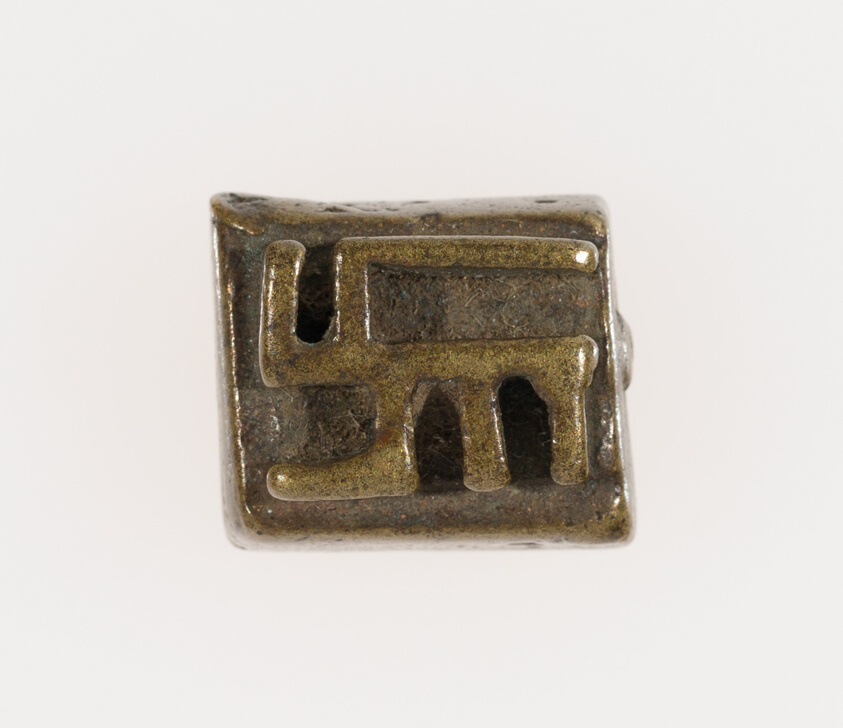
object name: Decorative Arts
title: Goldweight with a Geometric Design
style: asante, Arts of Africa, akan, african Art, Coastal West Africa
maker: Asante or related Akan-speaking peoples; Ghana; Coastal West Africa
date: 18th/19th century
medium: Copper alloy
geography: Ghana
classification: gold-weight; metal; arts of Africa; measure; african art; decorative arts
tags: geometric motif